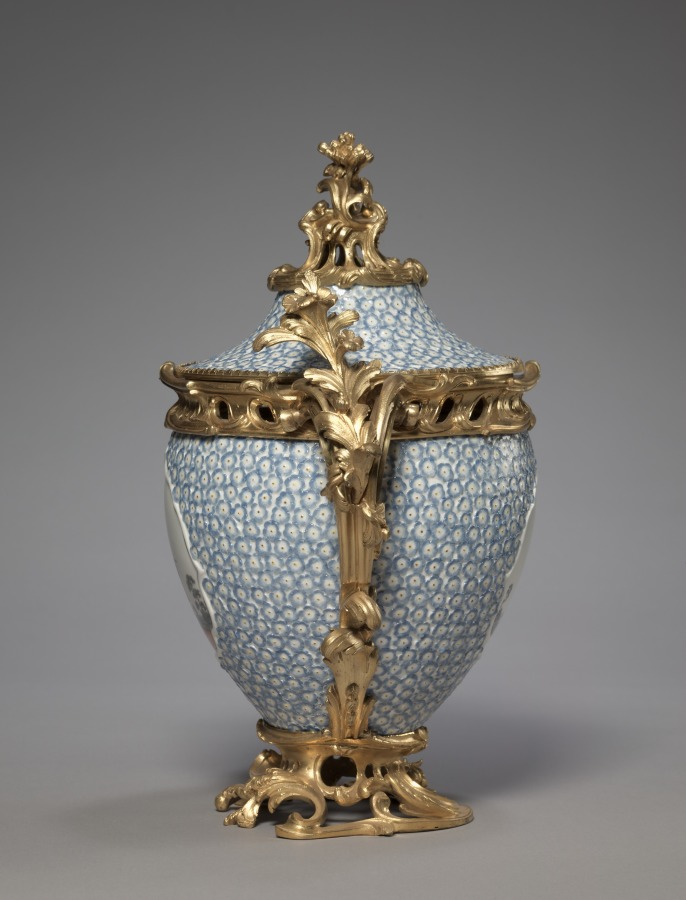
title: Covered Vase (1 of 2)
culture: Germany, 18th century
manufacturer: Meissen Porcelain Factory (German, est. c. 1710)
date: 1749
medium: porcelain mounted in gilt bronze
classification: Ceramic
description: One of these vases is dated 1749. They were perhaps part of a set of four covered vases that we know from documents were acquired by Mme. de Pompadour, mistress of Louis XV in 1752.